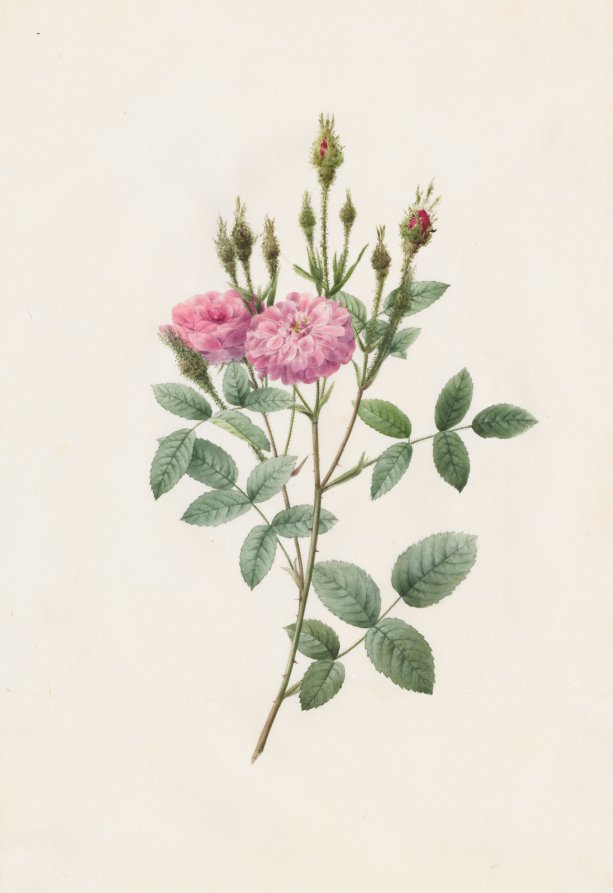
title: Rosa Pomponiana Muscosa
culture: France, 19th century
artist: Henri Joseph Redouté (French, 1766–1853)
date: 1817–1824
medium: watercolor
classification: Drawing